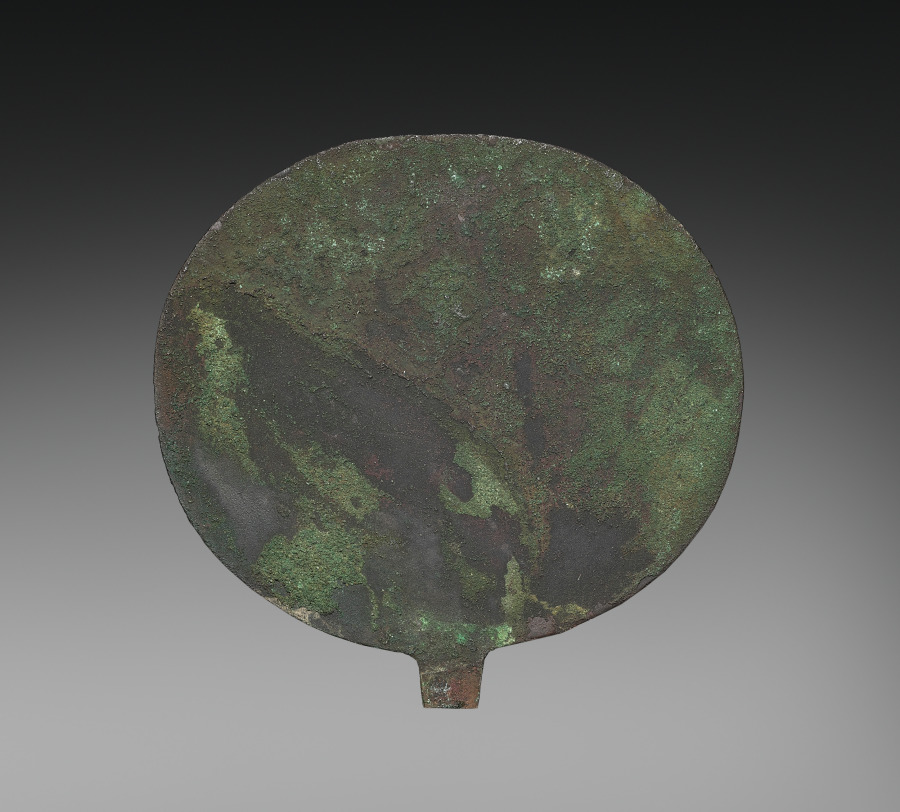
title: Mirror with Falcons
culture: Egypt, New Kingdom (1540–1069 BCE), Dynasty 18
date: 1540–1296 BCE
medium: mirror of copper, handle of tin-bronze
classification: Cosmetic Objects